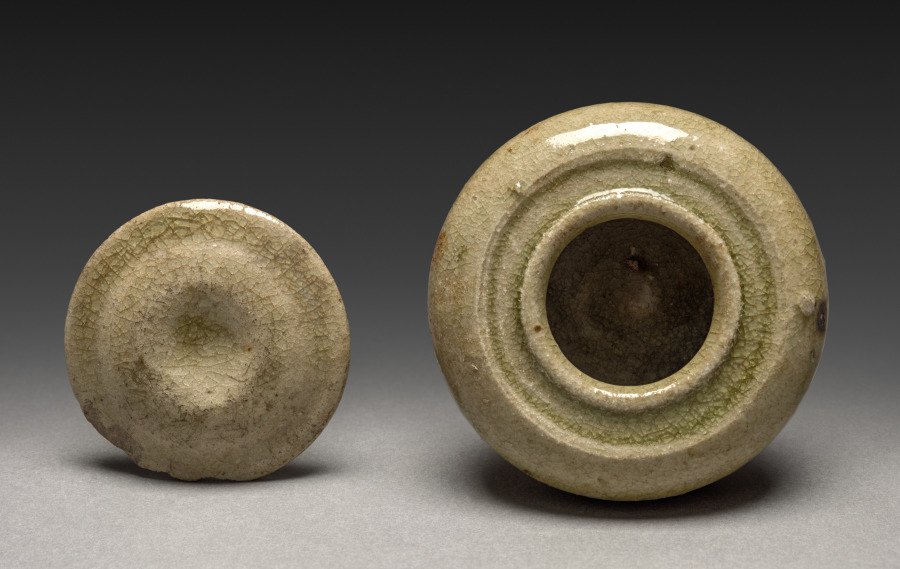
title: Incense Box: Seto Ware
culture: Japan, Kamakura period (1185–1333)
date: 1200s–1300s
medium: glazed stoneware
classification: Ceramic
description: Old Seto, also called Koseto ware, was typically coated with an ash glaze in the mineral feldspar, which produced a yellow or grayish-green glaze. This palette appealed to medieval Buddhist priests and samurai alike. The practice of burning incense in religious, court, and domestic settings dates from the early 700s in Japan.